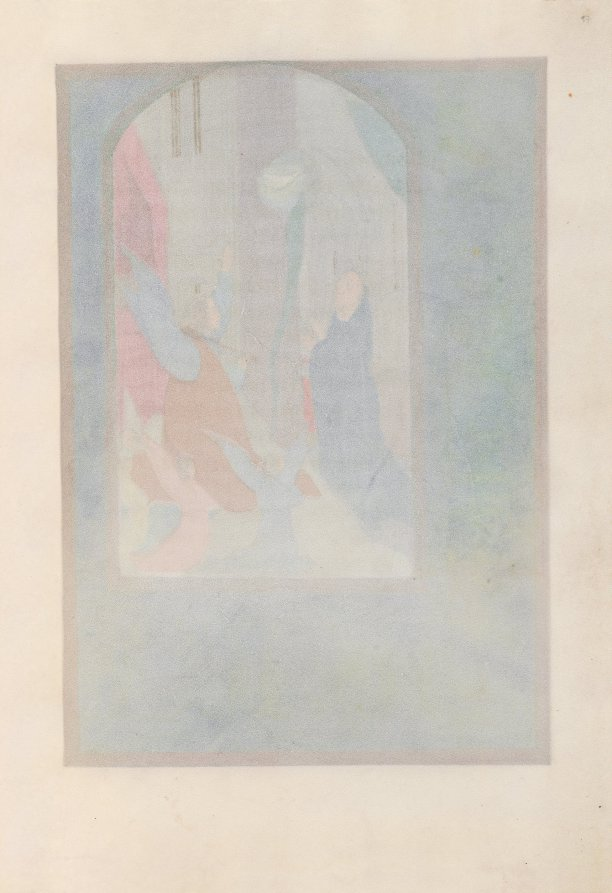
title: Hours of Queen Isabella the Catholic, Queen of Spain: Fol. 97r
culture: Flanders, Ghent and Bruges, late 15th century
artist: Master of the First Prayerbook of Maximillian (Flemish, c. 1444–1519)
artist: and Associates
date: c. 1500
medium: ink, tempera, and gold on vellum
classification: Bound Volume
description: This manuscript was illuminated by a circle of at least five highly organized manuscript painters active in the Flemish cities of Ghent and Bruges. The principal illuminator was Alexander Bening, who painted the majority of the book's miniatures. Manuscripts produced by this circle of artists are renowned for the decoration of their borders, which typically feature a rich variety of realistically-painted flowers, birds, and butterflies. This prayer book, called a book of hours, was intended not for a cleric, but for the private devotions of a lay person-in this case, Isabella the Catholic, Queen of Spain (1451-1504). Isabella's coat of arms embellishes the book's frontispiece. It is unlikely that the book was commissioned by the Queen herself; rather, she probably received it as a diplomatic gift from someone courting her patronage, perhaps Cardinal Francisco Jimenez de Cisneros. A Franciscan friar, Jimenez was dependent upon Isabella for his advancement, first to the post of Queen's confessor in 1492, and then to Archbishop of Toledo in 1495.